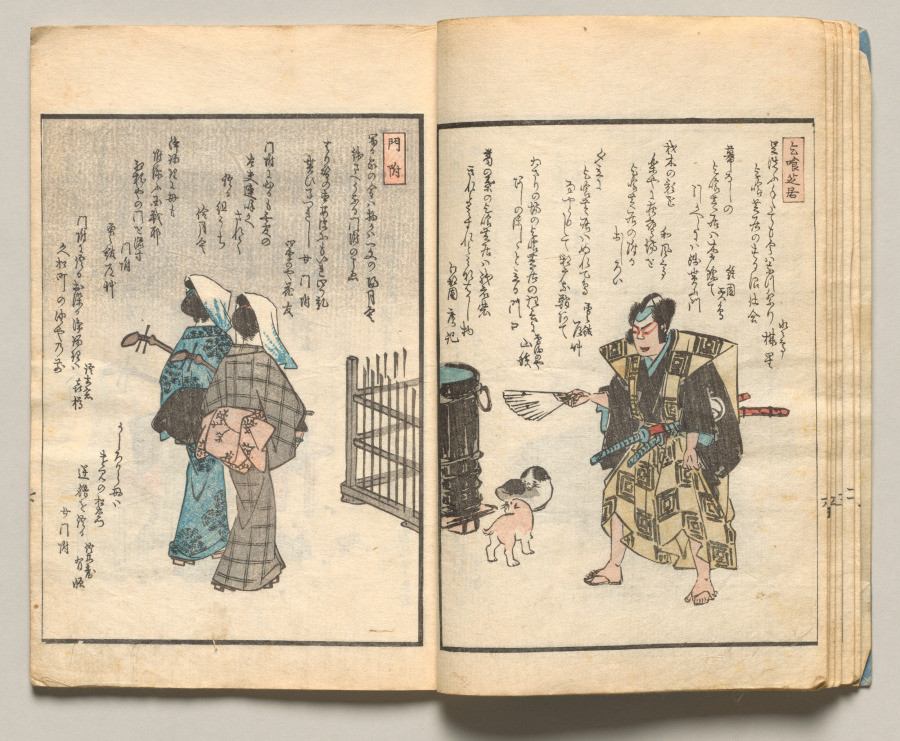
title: Spread Seven from Volume Three of People of Japan in Light Verse (Kyōka)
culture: Japan, Edo period (1615–1868)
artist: Utagawa Hiroshige (Japanese, 1797–1858)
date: 1857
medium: Woodblock-printed book; ink and color on paper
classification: Bound Volume